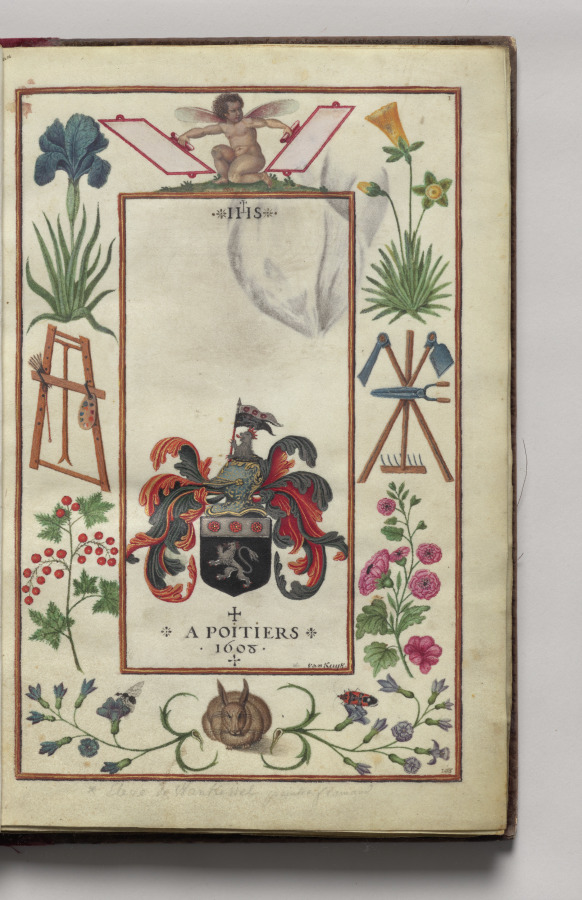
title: Title Page with Coat of Arms, border of gardening tools, Iris, and Narcissus, folio 1 (recto), from Florilegium (A Book of Flower Studies)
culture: France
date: 1608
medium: watercolor, ink, silver, and gold over occasional traces of pencil, on vellum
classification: Bound Volume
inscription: Dated: Poitiers 1608 (on frontispiece) Signed: On frontispiece in black ink, lower right: Van Kuyk Notation on drawing: Frontispiece: in pencil, lower margin: * élève de Van Kessel, peintre flammand (* in pencil also appears in front of Van Kuyk's name).